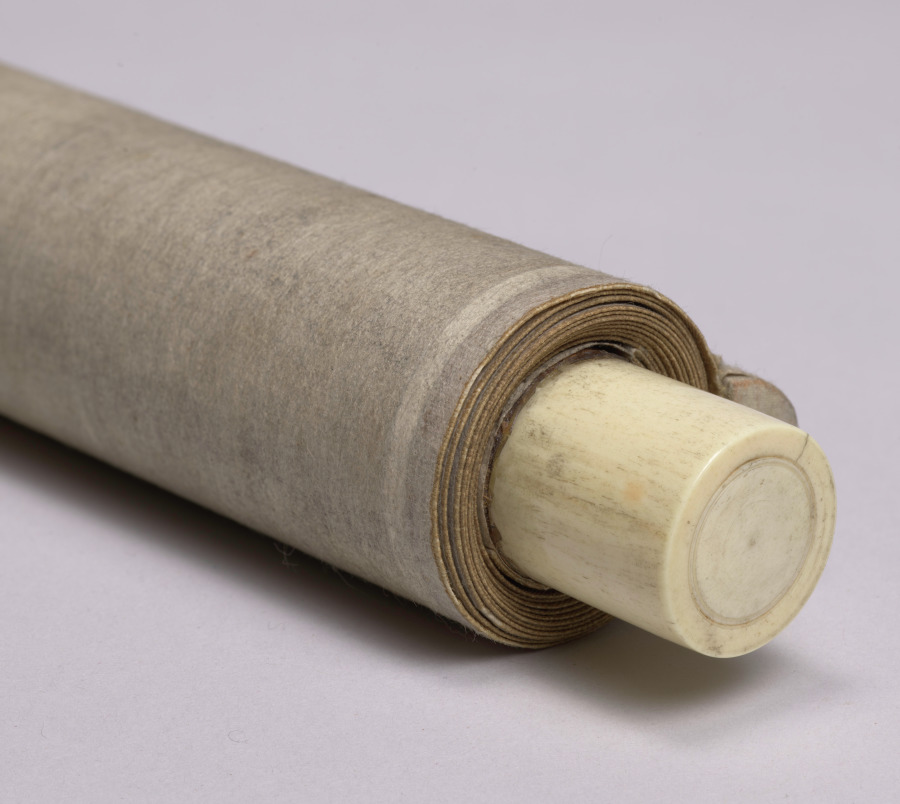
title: One Hundred Images of Fudo (Acala)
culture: Japan, Kamakura period (1185–1333)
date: 1200s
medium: Woodblock print mounted as a hanging scroll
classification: Print